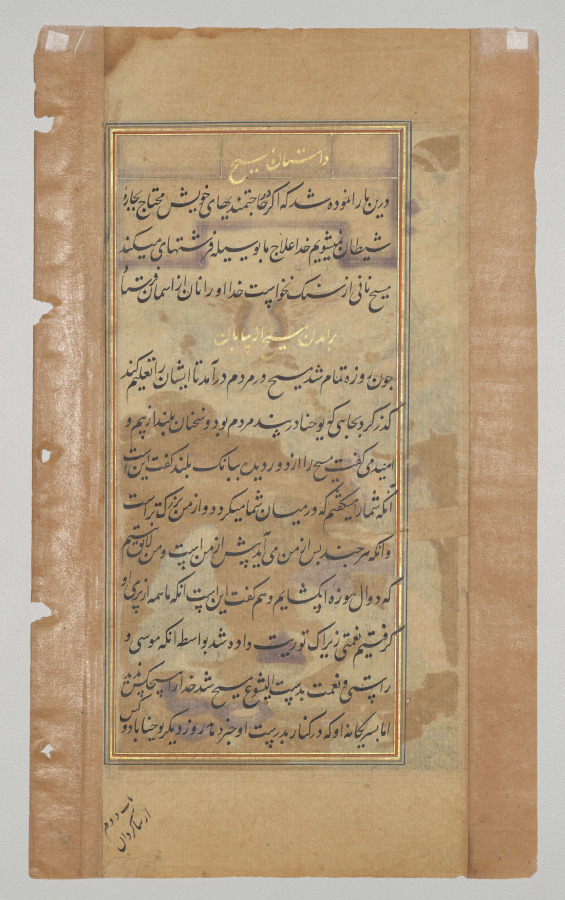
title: Text page from a Mirror of Holiness (Mir’at al-quds) of Father Jerome Xavier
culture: Mughal India, Allahabad, made for Prince Salim (1569–1627)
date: 1602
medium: Ink and gold on paper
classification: Manuscript